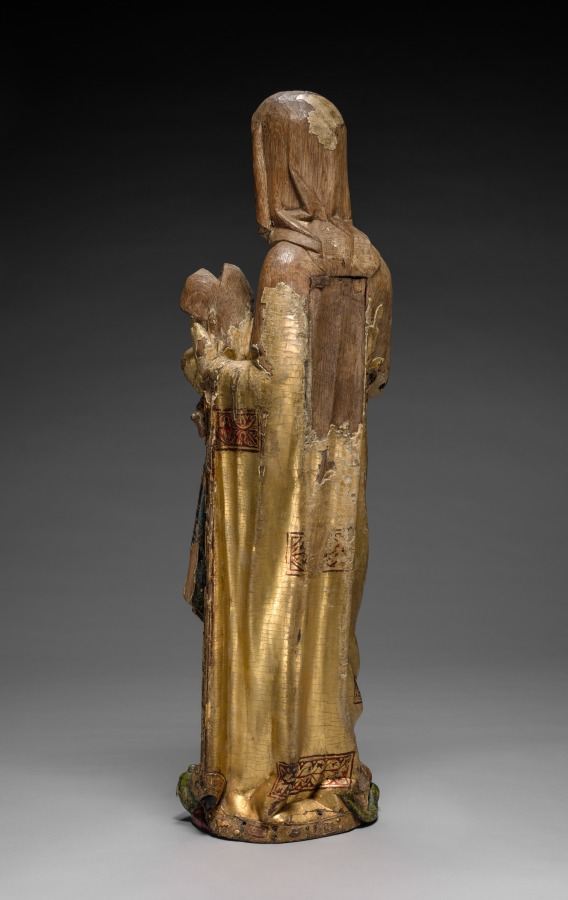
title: Virgin and Child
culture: Mosan (Valley of the Meuse), Liège(?), late 13th century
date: late 1200s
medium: wood (oak) with polychromy and gilding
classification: Sculpture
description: This sculpture is a rare survival in wood from the valley of the Meuse River (modern Belgium and Holland), an important region for the production of ecclesiastical art in the 1100s and 1200s. The elegantly draped figure is remarkable for the preservation of much of its original paint and gilding, including the Virgin's gilded mantle highlighted with decorative bands of geometric patterns and the green dragon on which she stands. There are small settings around the Virgin's neck and along the border of the mantle that would have originally been set with gem and glass cabochons in imitation of the richly adorned metalwork for which Mosan art was highly esteemed. The settings for these cabochons provide some hint of the original opulence of this sculpture. The Virgin's serene features and beautiful countenance are noteworthy, as is the refined execution of the draperies.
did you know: Dragons, like the one Mary is standing on, sometimes look more like snakes in medieval art.